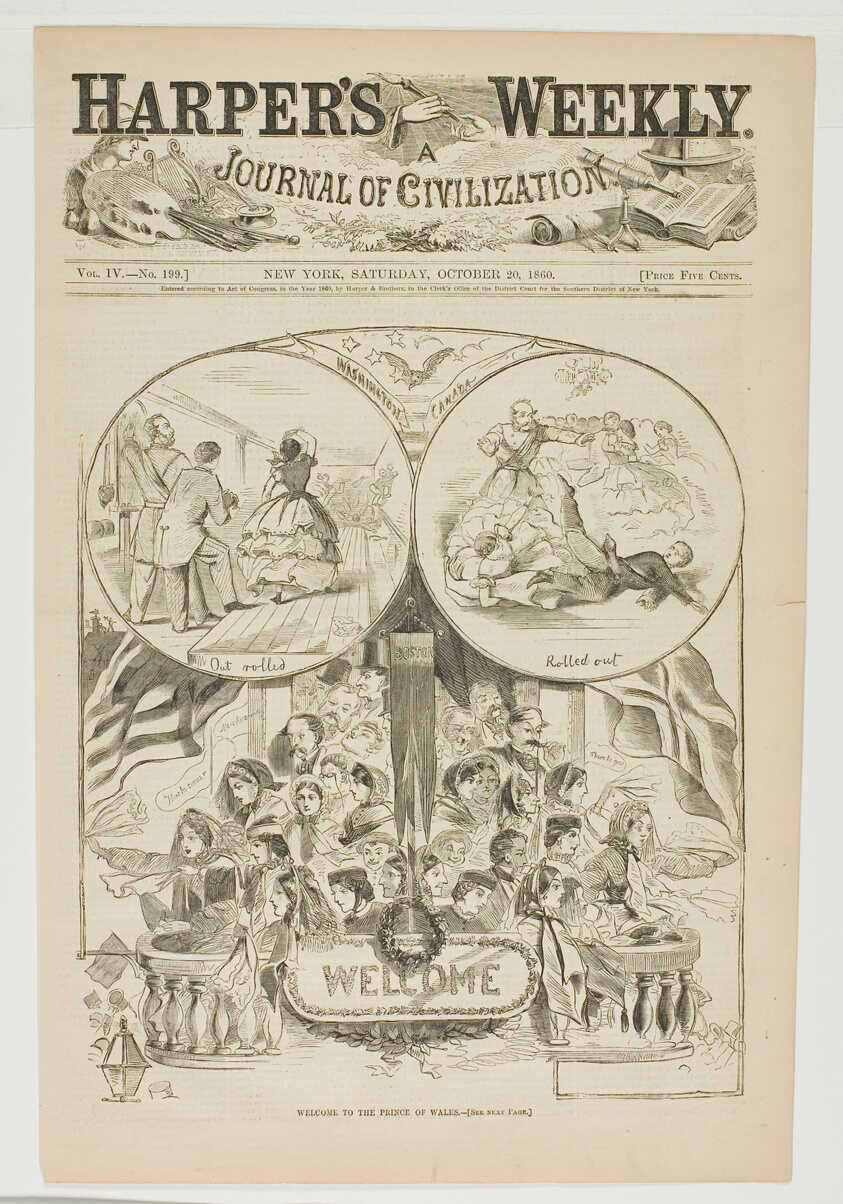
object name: Print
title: Welcome to the Prince of Wales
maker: Winslow Homer (American, 1836-1910); published by Harper's Weekly (American, 1857-1916)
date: published October 20, 1860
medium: Wood engraving on paper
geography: United States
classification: wood engraving; print; prints and drawing